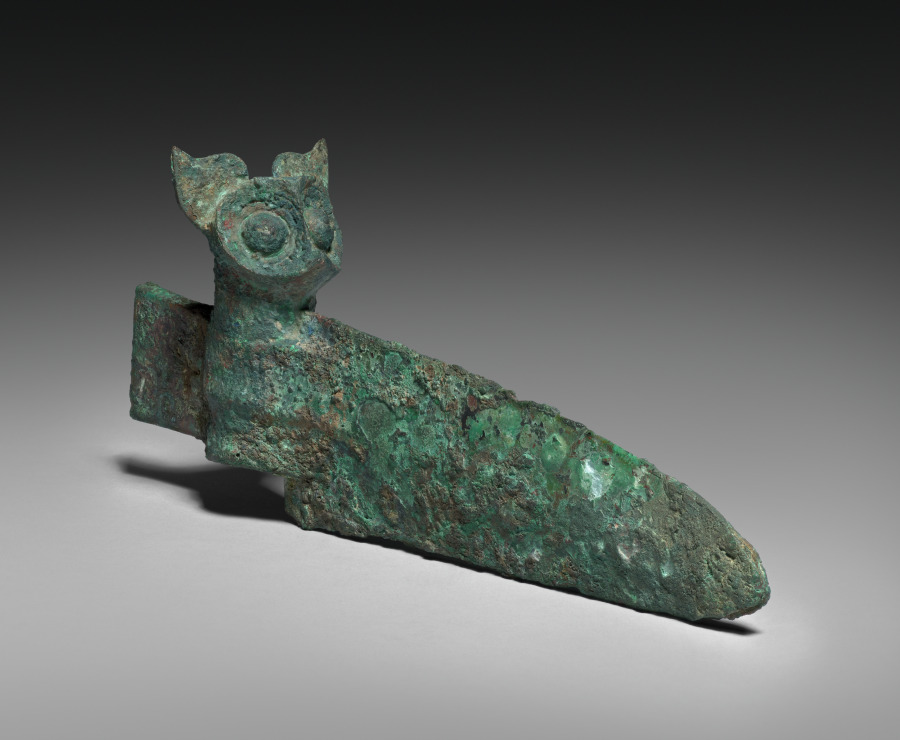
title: Axe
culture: China, Shang dynasty (c. 1600–c. 1046 BCE)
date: 1766–1045 BCE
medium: bronze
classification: Metalwork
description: The head of an owl with large eyes and ears, sitting above the blade of a halberd-axe, may have deterred evil and harm from its carrier. Whether such an axe was used in ritual or warfare is not clear.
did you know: A staff or pike would have attached to the blade via the socket below the owl's head.